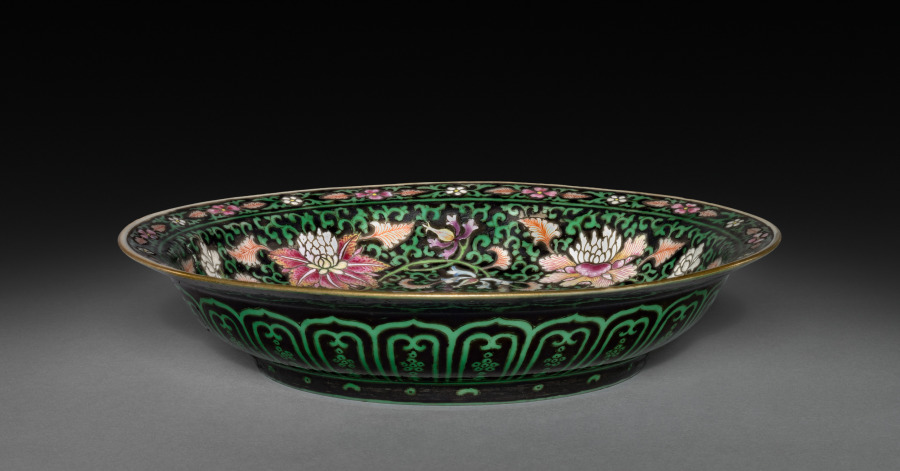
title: Dish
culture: China, Qing dynasty (1644–1911), Qianlong reign (1736–95)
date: 1736–95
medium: porcelain with famille rose overglaze enamel decoration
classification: Ceramic